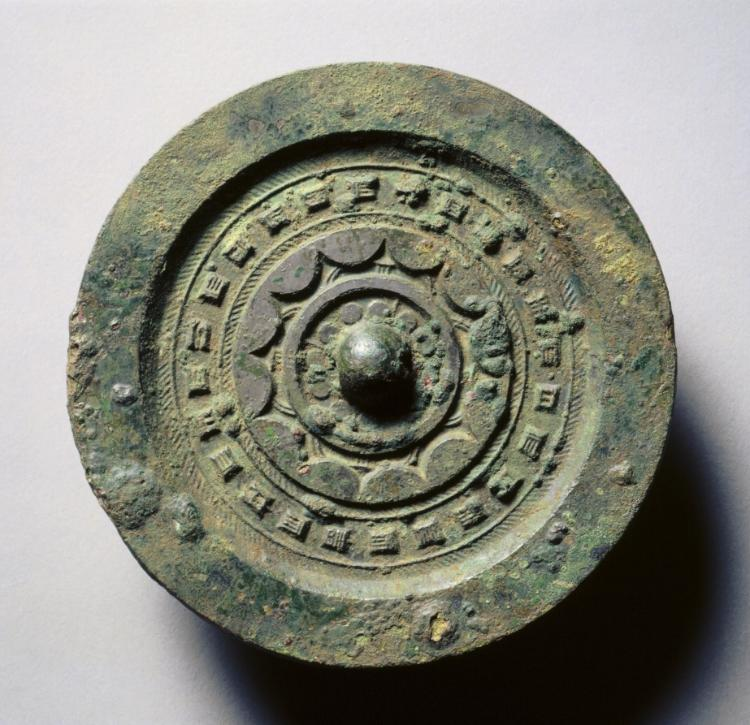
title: Mirror with Concentric Circles and Linked Arcs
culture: China, Western Han dynasty (206 BCE–8 CE)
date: late 300s BCE–50 CE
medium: bronze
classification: Metalwork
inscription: Its inner purity is shown in perfect reflection. Its light is the image of the sun and moon. . .